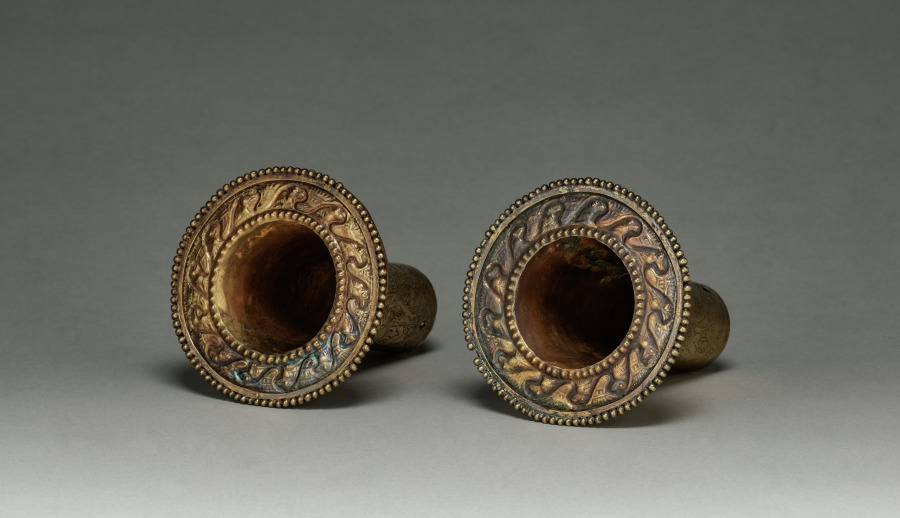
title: Pair of Ear Flares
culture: Peru, North Coast, Chimú style (900-1470)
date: 900–1470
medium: hammered gold alloy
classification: Metalwork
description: North Coast ear ornaments typically have a long shaft that balanced the weight of the glorious frontal. This pair illustrates Chimú interest in the sea, which had great economic and religious importance. On the shafts are bands of seabirds and waves, and a similar pattern edges the frontals, which were altered in modern times. Originally solid disks, the frontals' centers were cut out and a dotted band was added to the rim.